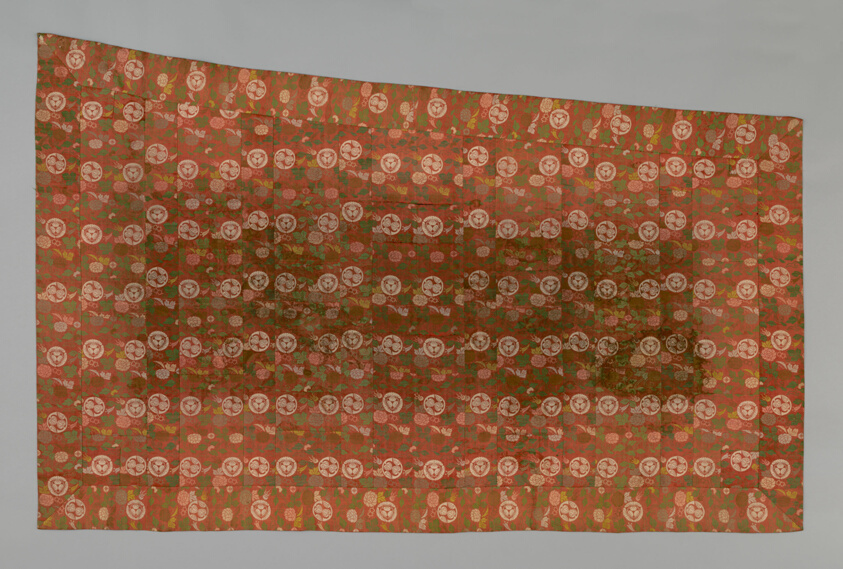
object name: Textile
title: Kesa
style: meiji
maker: Japan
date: Meiji period (1868–1912), late 19th century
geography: Japan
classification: textile; weaving; liturgical - buddhist